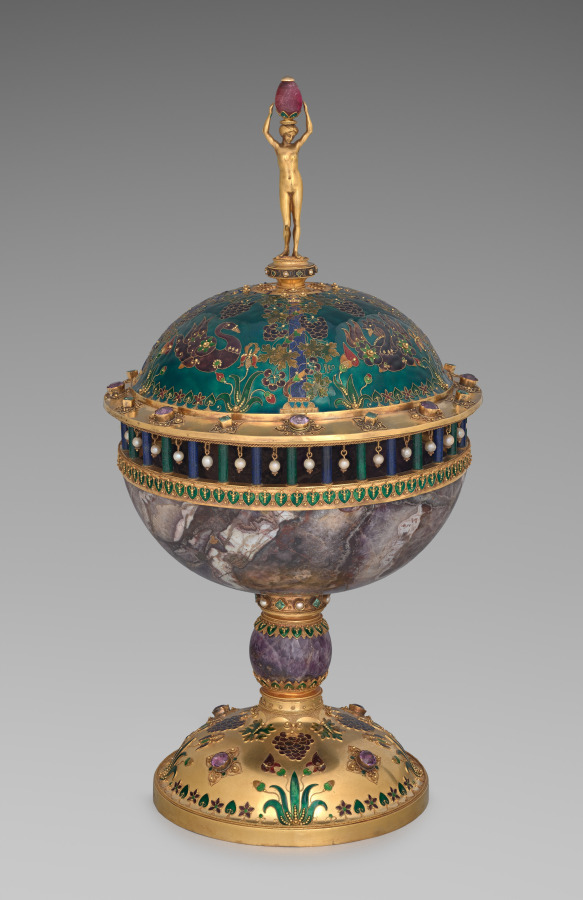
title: Covered Cup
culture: France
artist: Armand Point (French, 1861–1932)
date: c. 1897–99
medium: gilt copper alloy, enamel, amethysts, emeralds, ruby, pearls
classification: Metalwork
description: Armand Point started his career as a painter, but in the late 1800s, he became increasingly interested in decorative arts. In 1896, he established the Atelier de Haute-Claire in Marlotte, a colony of artists who handmade works of art to a very high standard. This cup was made there and is particularly ornate, showcasing different materials such as metal, enamels, gemstones, and pearls, as well as goldsmithing techniques.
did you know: The cup was originally acquired by Émile Nail-Démellette, Point's old high-school friend and later his benefactor.